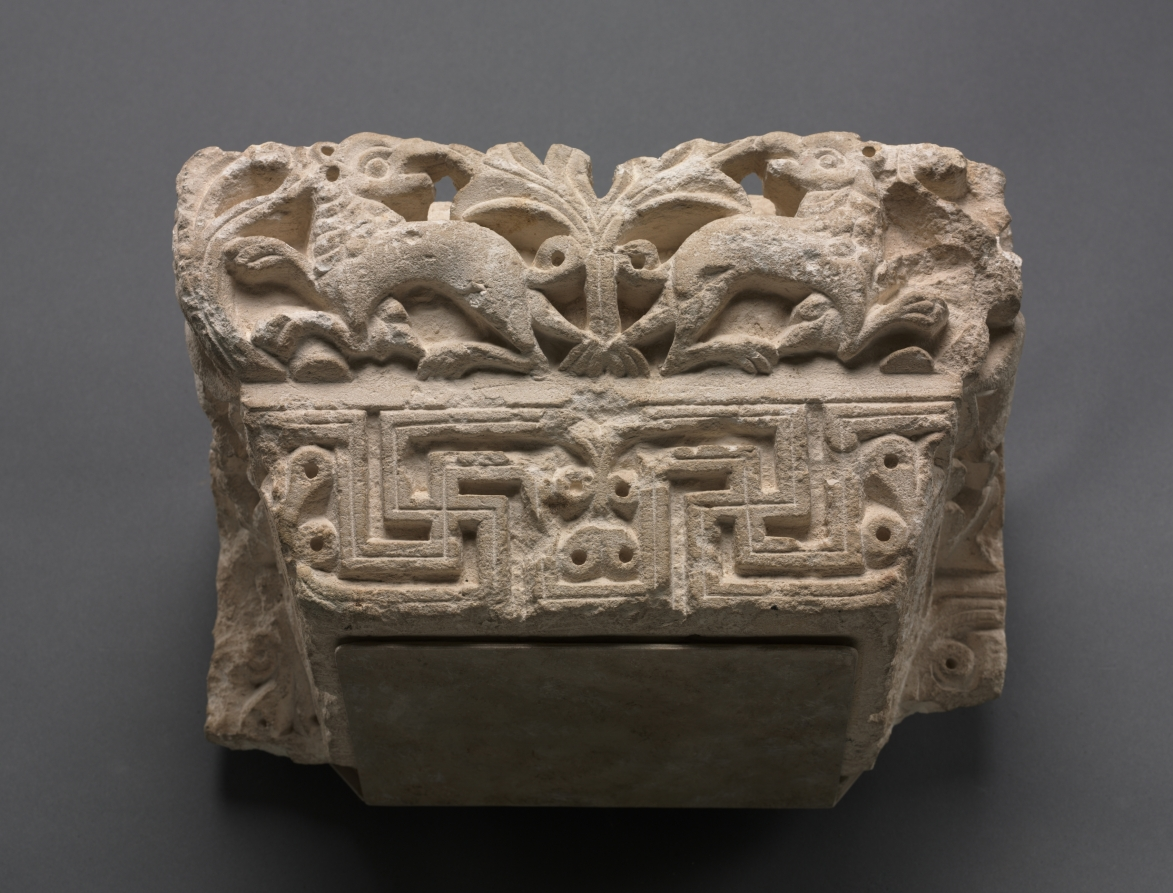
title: Engaged Capital with Animals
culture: Egypt, Coptic period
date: 400s - 500s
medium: limestone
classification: Sculpture